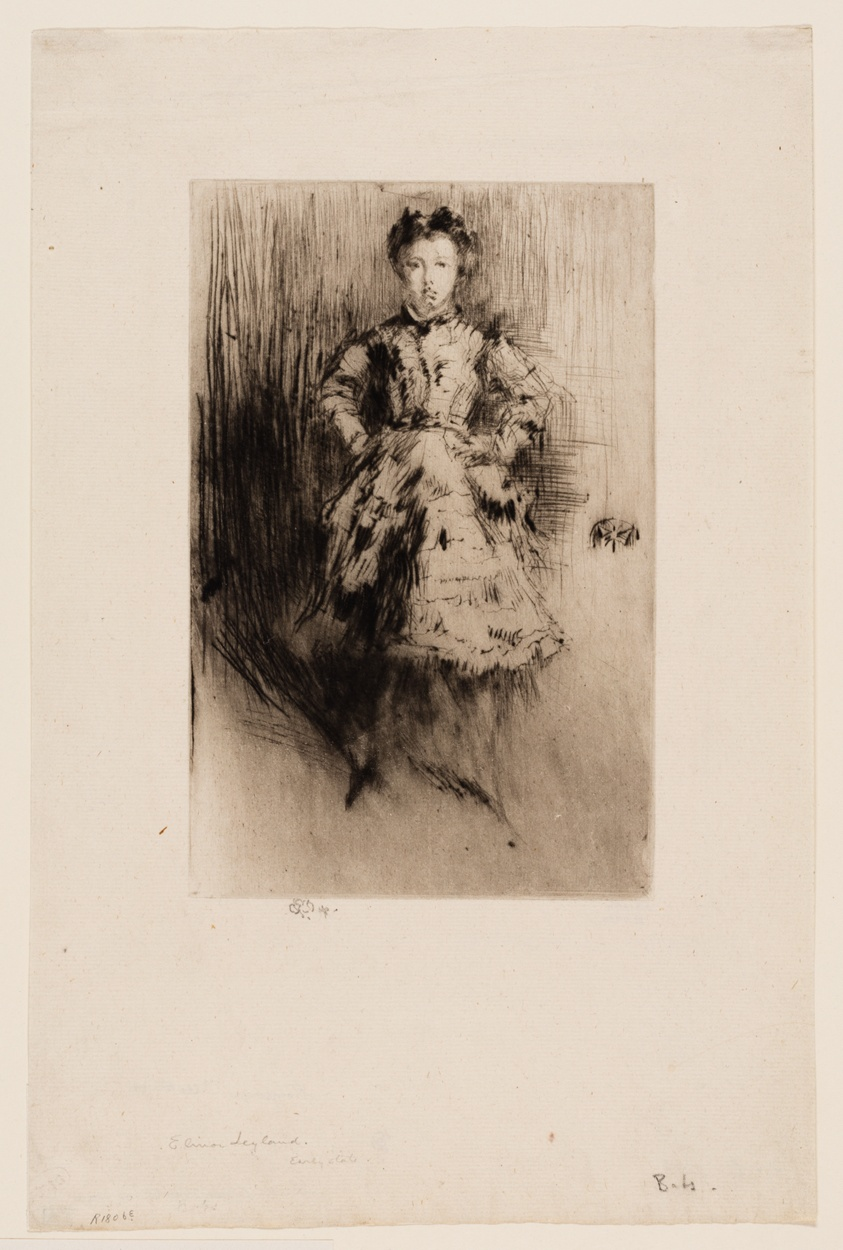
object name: Print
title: Elinor Leyland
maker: James McNeill Whistler (American, 1834-1903)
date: 1874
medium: Drypoint in black ink on ivory laid paper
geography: United States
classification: drypoint; print; prints and drawing; paper